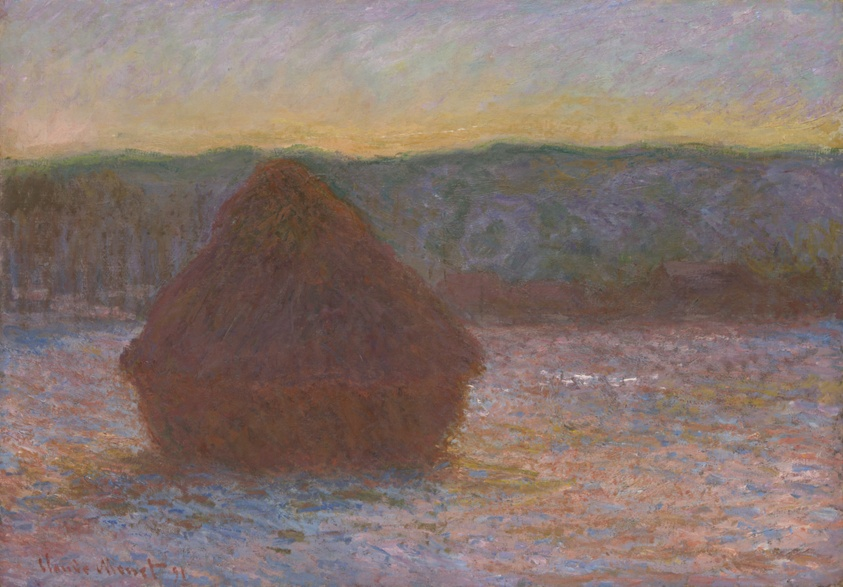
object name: Painting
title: Stack of Wheat (Thaw, Sunset)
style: Impressionism, nineteenth century, 19th century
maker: Claude Monet (French, 1840–1926)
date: 1890–91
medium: Oil on canvas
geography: France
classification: oil on canvas; paint; oil paintings (visual works); french; painting; european painting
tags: wheat, trees, sun, rural life, nature, hills, seasons, weather/seasons, landscapes